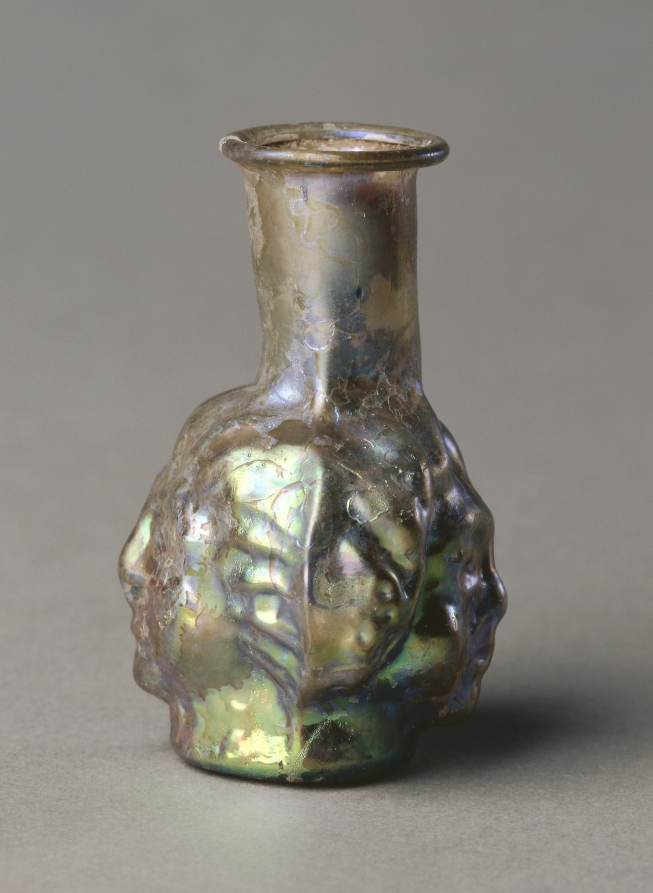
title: Janiform Head Flask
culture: Roman, probably Eastern Mediterranean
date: 100–400 CE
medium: glass, mold-blown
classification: Glass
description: Called Janiform after Janus, the two-faced Roman god associated with doorways and beginnings, two-faced head flasks like this were popular across the Roman Empire. The faces themselves, quite similar to one another, could both represent Janus, although he is typically bearded and here the gender is unclear. Some other two-faced head flasks clearly differentiate between the two sides, showing one serious, the other smiling.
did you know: The iridescence covering much of the surface obscures the original violet-like color.